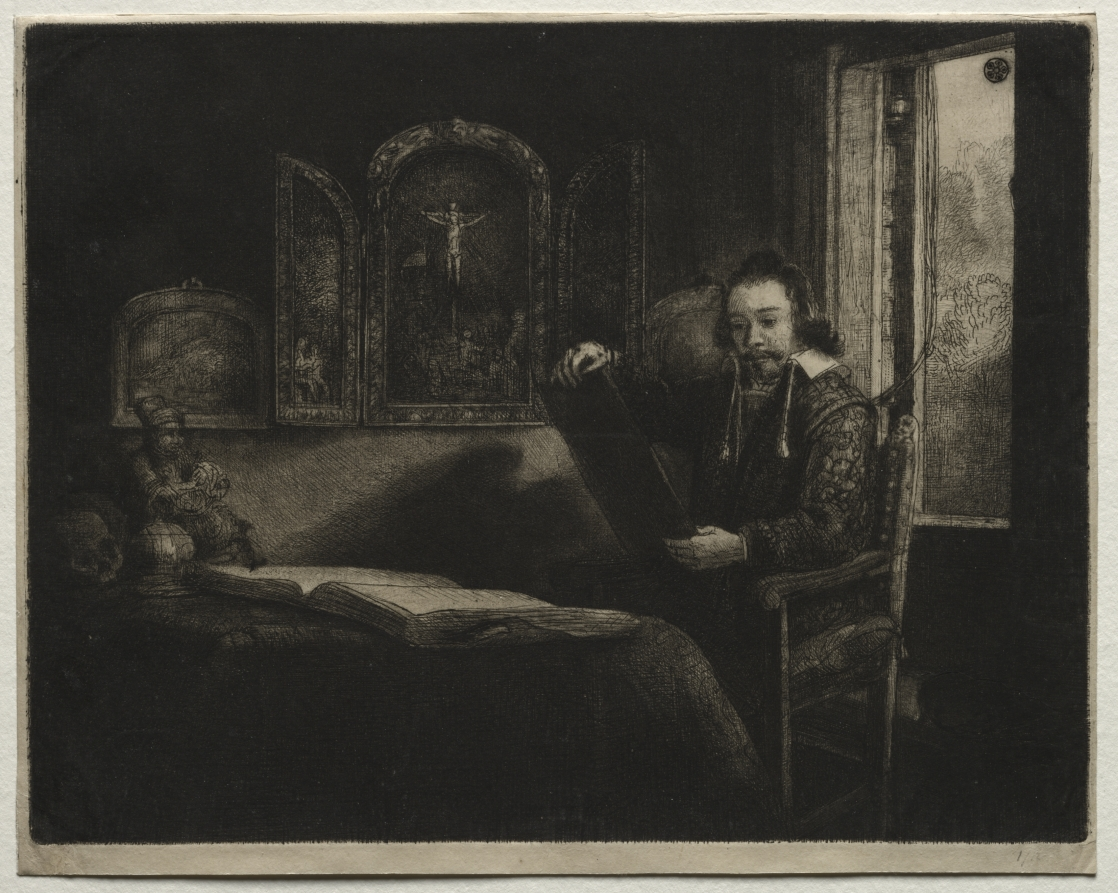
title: Abraham Francen, Apothecary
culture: Netherlands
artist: Rembrandt van Rijn (Dutch, 1606–1669)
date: c. 1657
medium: etching, drypoint, and engraving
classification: Print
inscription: lower right, in graphite: 1/4 ; VERSO, upper left, in graphite: 283 ; upper left, in graphite: 2 · 9 / + [illegible character] 1 · 10 ; upper center, in graphite: J. Boy: --1796 ; upper right, in graphite: 4590[sideways]; lower left, in graphite: [D?] ; lower left, in graphite: 1526/3[upside down] ; lower left, in graphite: A78486 ; lower center, in graphite: IS / C[backwards]< ; lower right, in graphite: 3[sideways] ; lower right, in graphite: NOX. ; lower right, in pen and brown ink: [illegible]